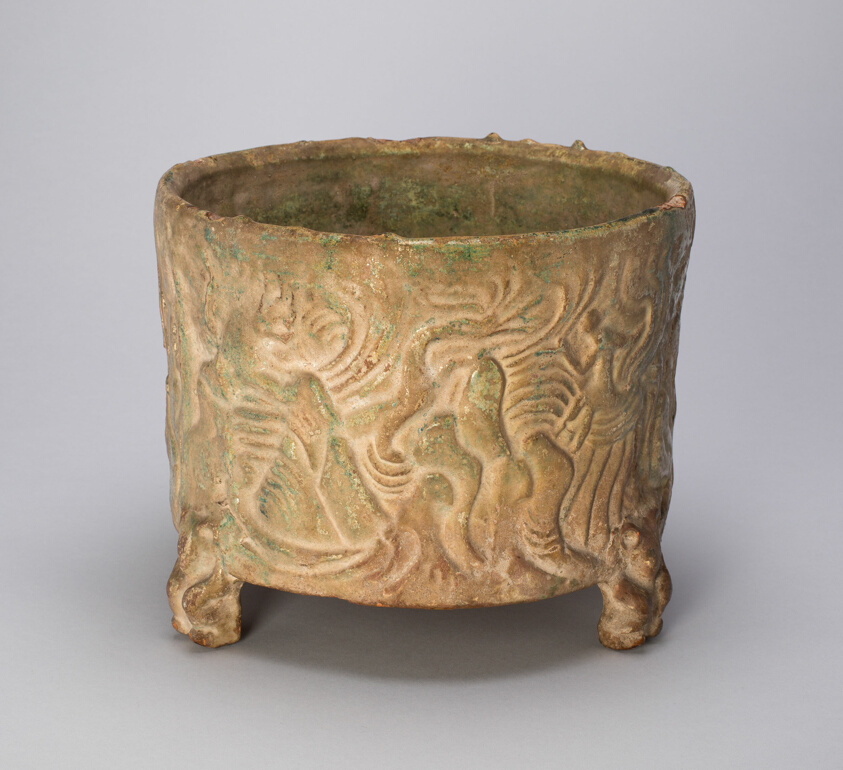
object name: Vessel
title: Tripod Cylindrical Jar (Lian or Zun) with Creatures Amid Hills, Bear-Shaped Feet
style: Chinese (culture or style)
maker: China, probably Shaanxi province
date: Eastern Han dynasty (A.D. 25–220)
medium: Earthenware with lead green glaze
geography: China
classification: ceramics; asian art; vessel